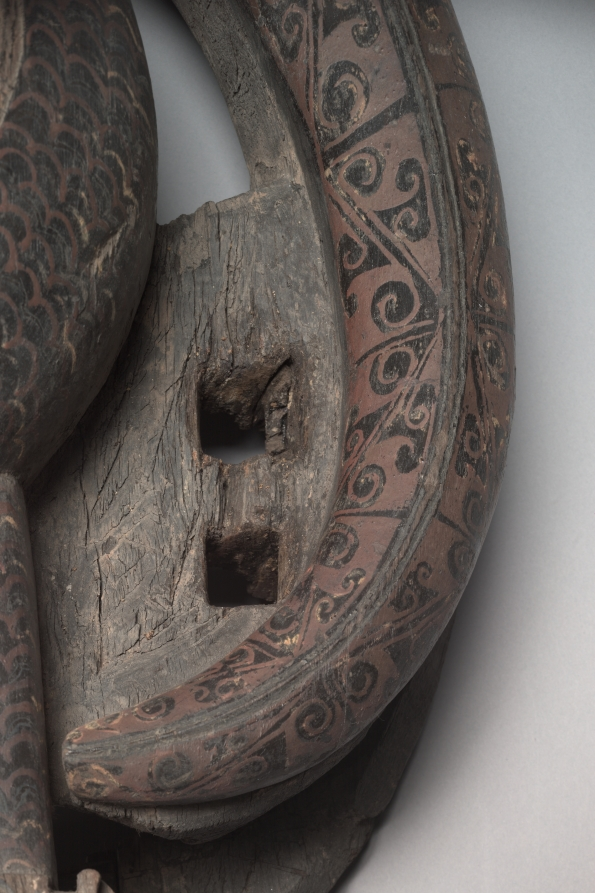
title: Cranes and Serpents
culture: China, reportedly from Hunan province, Changsha, Warring States period (475–221 BCE), State of Chu (c. 1046–223 BCE)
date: 475–221 BCE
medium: lacquered wood with polychromy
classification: Sculpture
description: A different style of ritual art developed in the state of Chu in South China. In addition to bronze vessels, lacquered wood artifacts expanded the repertory of ritual implements. This extraordinary sculpture was probably a drum stand for supporting a suspended drum in ritual ceremonies. It is unique among other excavated drum stands of the Chu, which typically show two birds standing on tigers. The theme of the bird stepping on the serpent was common in the Chu visual culture. Yet the slender proportions and seemingly flimsy structure of this particular set raise the question of whether it was utilitarian or mostly served symbolic functions in the tomb. The birds' and serpents' bodies have designs painted in red lacquer and yellow pigment against the black lacquer. Scientific analyses confirm the additional use of a blue or green pigment that has been discolored over time.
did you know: The cranes' long necks allowed a lightweight drum to be suspended from strings through the beaks, while the densely intertwined snakes provided a weighty base to stabilize the object during musical performances.